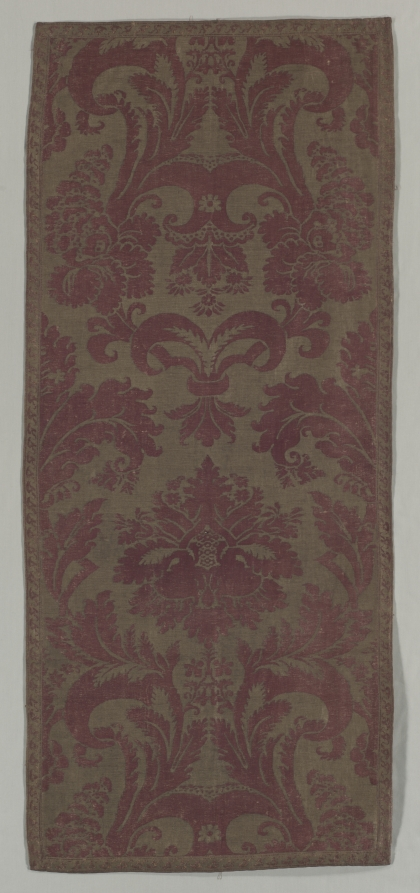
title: Reproduction of a Florentine Velvet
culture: Italy, Venice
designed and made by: Mariano Fortuny y Madrazo (Spanish, 1871–1949)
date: mid 20th century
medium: plain weave cotton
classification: Textile